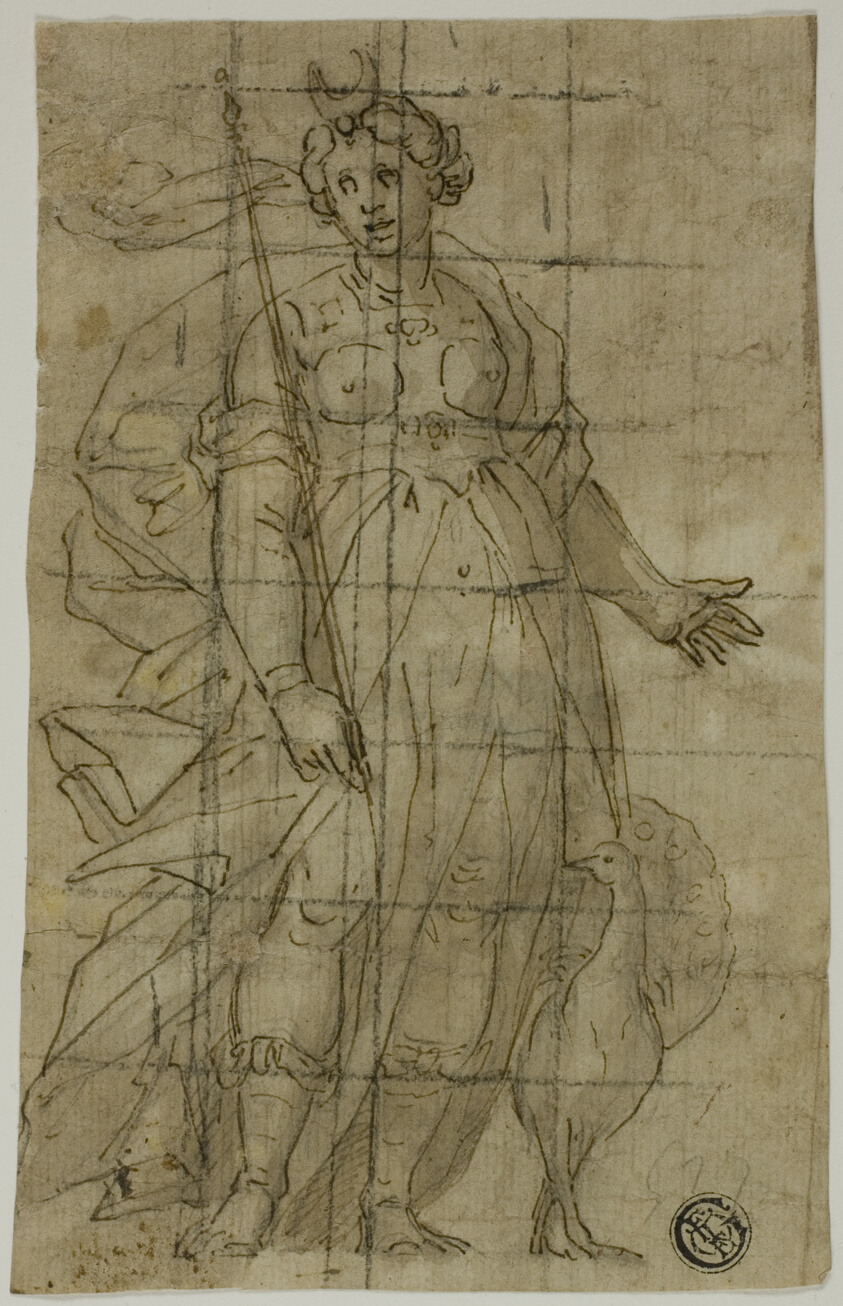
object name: Drawing and Watercolor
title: Study for Juno (or Diana) with a Peacock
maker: Luca Cambiaso; Italian, 1527-1585; or Lazzaro Tavarone; Italian, 1556-1641; or Bernardo Castello; Italian,1557-1629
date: 1584/85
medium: Pen and brown ink with brush and brown wash, on ivory laid paper, squared in black chalk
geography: Italy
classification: ink with wash; drawings (visual works); prints and drawing